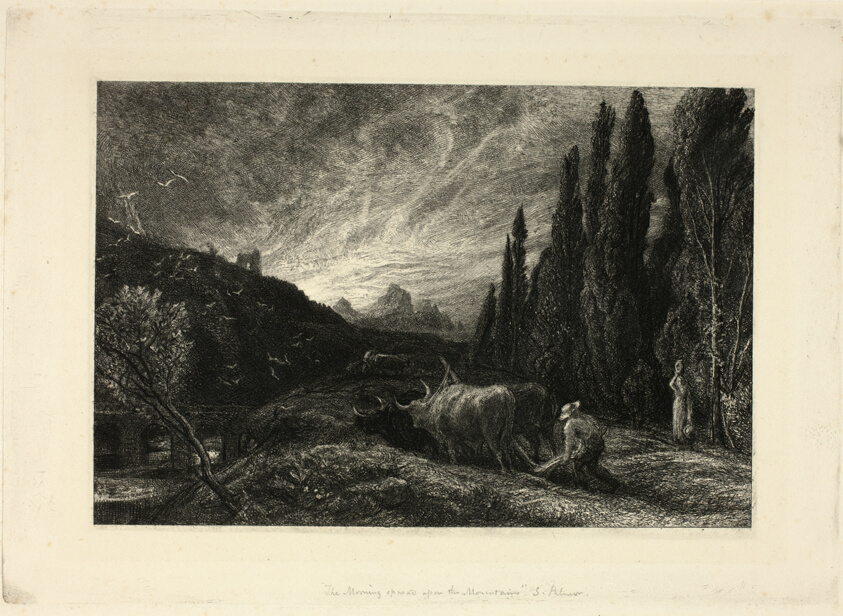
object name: Print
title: The Early Plowman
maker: Samuel Palmer (English, 1805-1881)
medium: Etching in black on paper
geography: England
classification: etching; print; prints and drawing